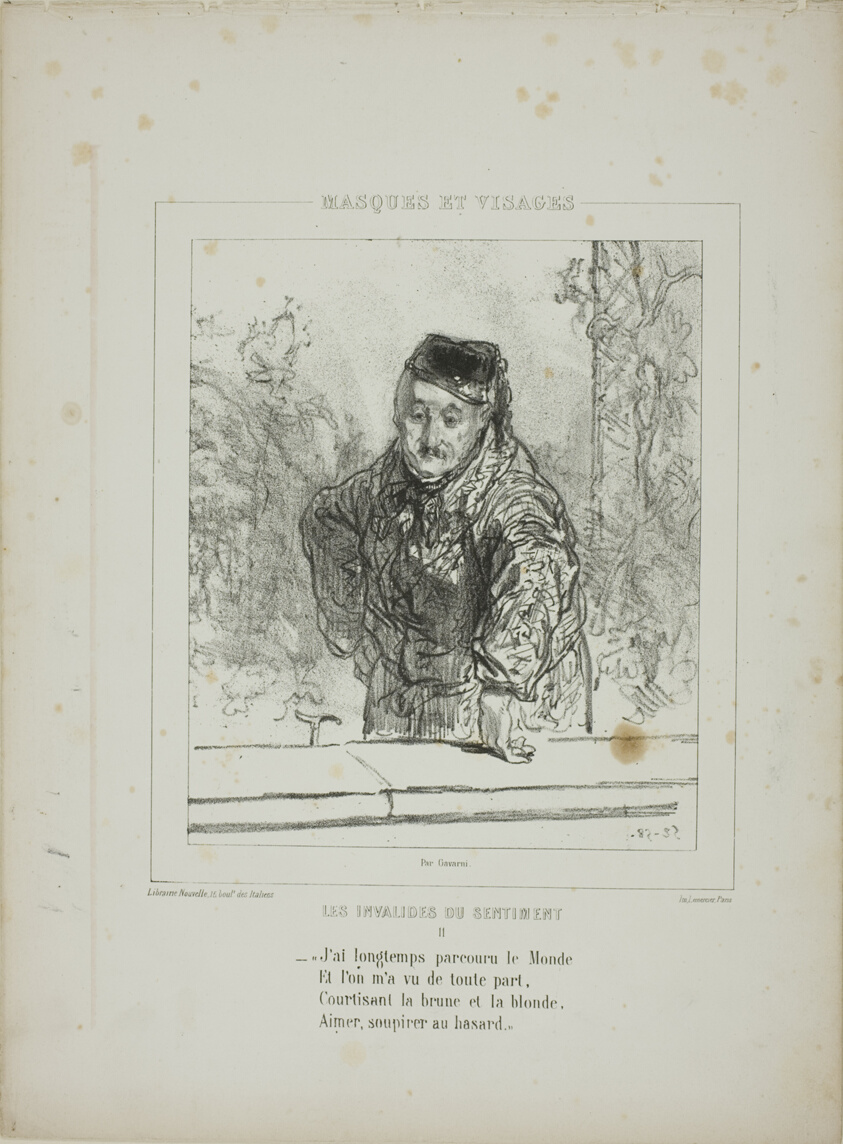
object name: Print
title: Les Invalides du Sentiment: - "J'ai longtemps parcouru le Monde...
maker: Paul Gavarni (French, 1804-1866)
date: 1852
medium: Lithograph in black on cream wove paper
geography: France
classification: lithograph; print; prints and drawing